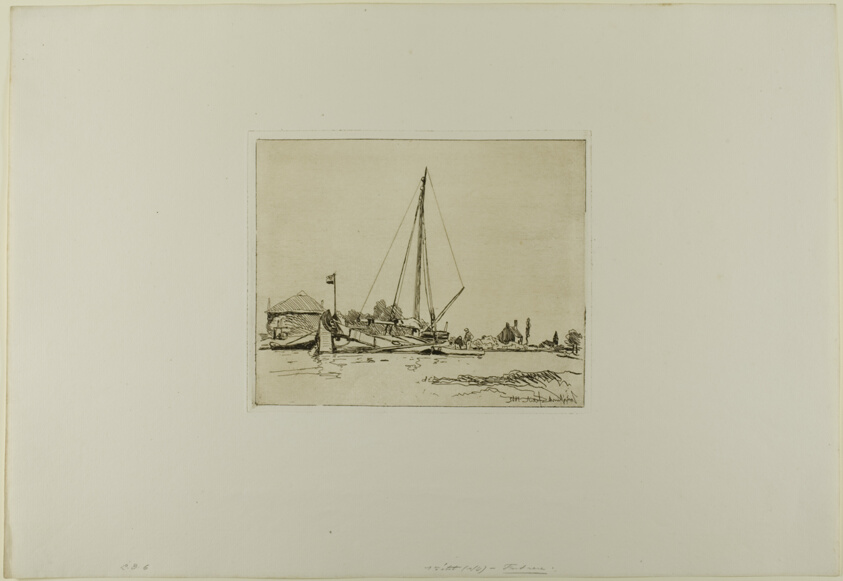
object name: Print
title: The Moored Boat, from Cahier de six eaux-fortes, vues de Hollande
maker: Johan Barthold Jongkind (Dutch, 1819-1891)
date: 1862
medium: Etching in brownish-black on ivory laid paper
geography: Netherlands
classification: etching; paper; print; prints and drawing